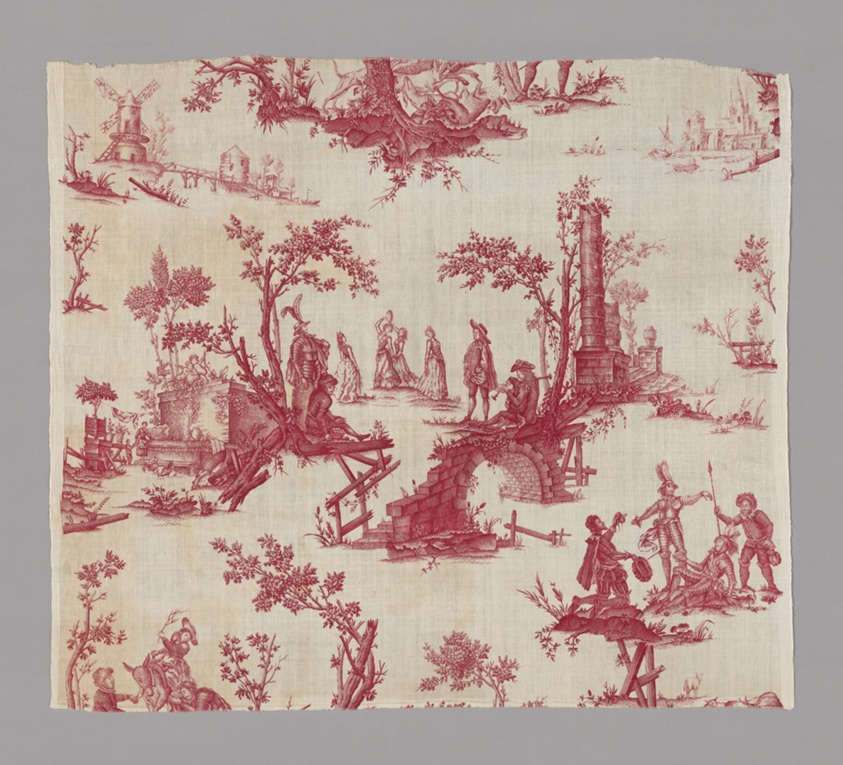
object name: Textile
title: Don Quichotte (Don Quixote) (Furnishing Fabric)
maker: Possibly after design by Jean Jacques Lagrenèe le Jeune (French, 1739–1821) after engravings by Charles Nicolas Cochin l'Aîné (French, 1688–1754), Magdaleine Hortenels Cochin (French, 1683–1767), Jean Baptiste Haussard (French, 1679/80–1749), and Louis Silvestre l'Aîné (French, 1664–1740); Based on paintings by Charles Antoine Coypel (French, 1694–1752); France, Nantes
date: c. 1785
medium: Cotton, plain weave; copperplate printed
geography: France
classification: textile; weaving - printed; furnishing textile